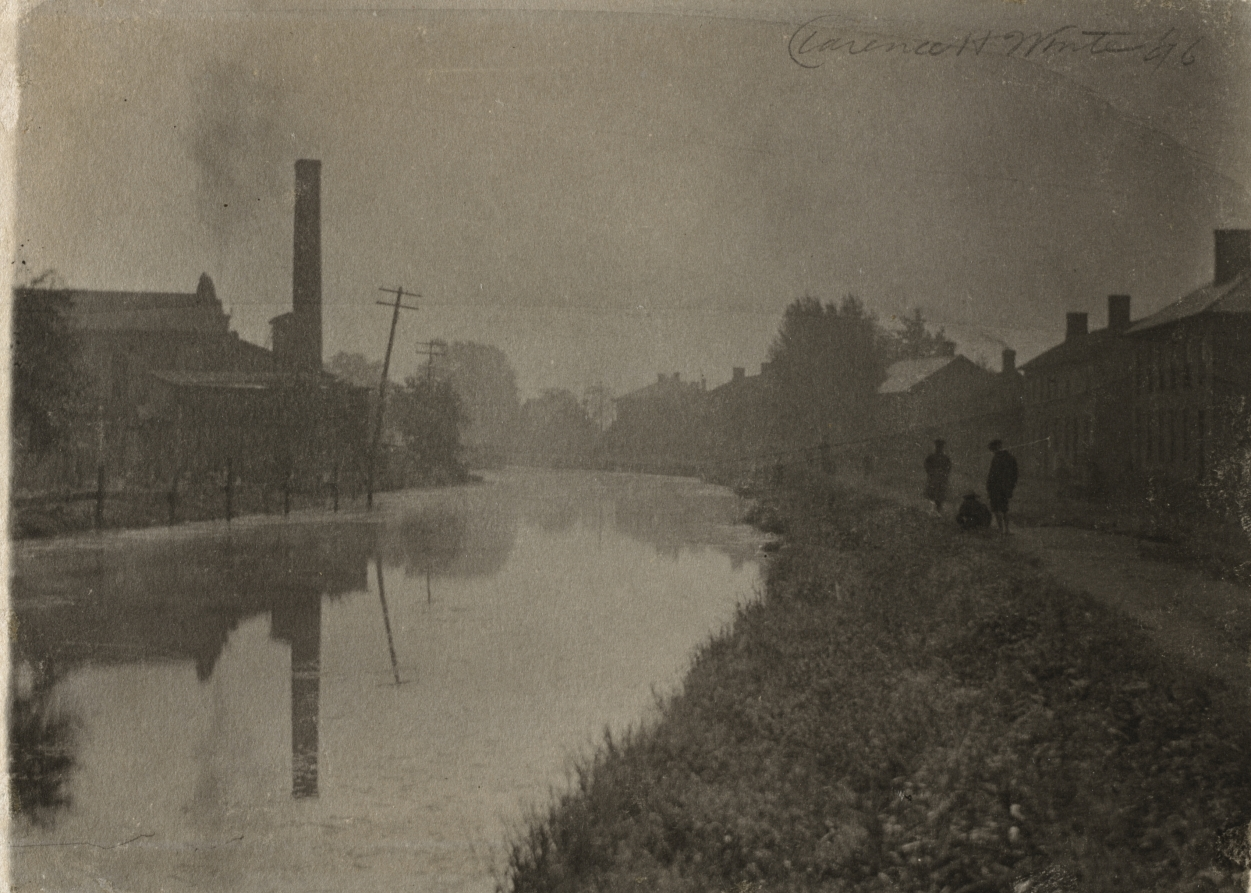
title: Along the Old Canal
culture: America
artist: Clarence H. White (American, 1871–1925)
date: 1896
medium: platinum print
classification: Photograph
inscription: Written in pencil on recto: "Clarence H. White [signed] '96"; in pencil on verso: "by Clarence White / 'Along the Canal' / Newark, Ohio / this canal ran by RR, / The Fleek Co. Wholesale / grocer's, where Clarence / worked as Bookeeper [sic]"